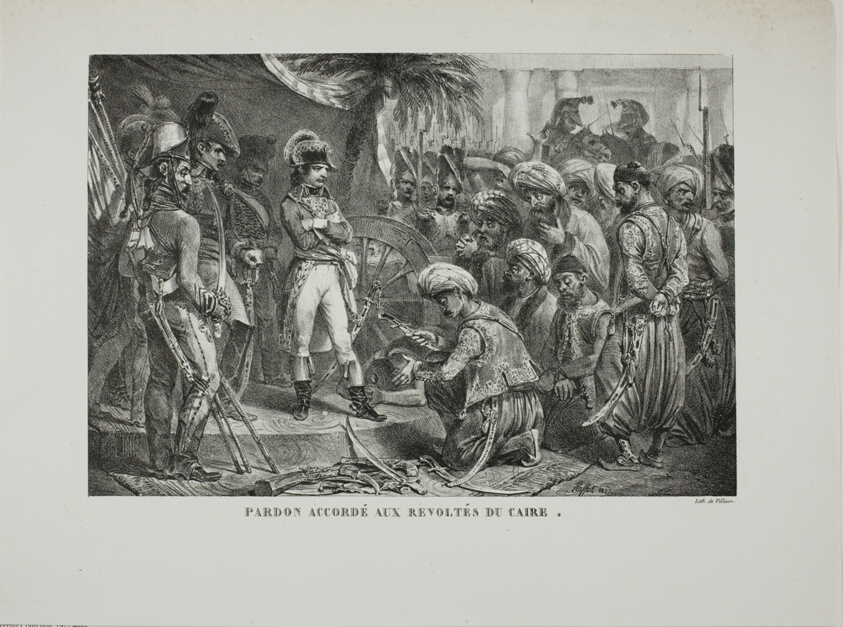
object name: Print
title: Pardon Granted to the Cairo Rebels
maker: Denis Auguste Marie Raffet (French, 1804-1860); printed by François le Villain (French, active 19th century)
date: 1827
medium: Lithograph in black on ivory wove paper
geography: France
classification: lithograph; print; prints and drawing